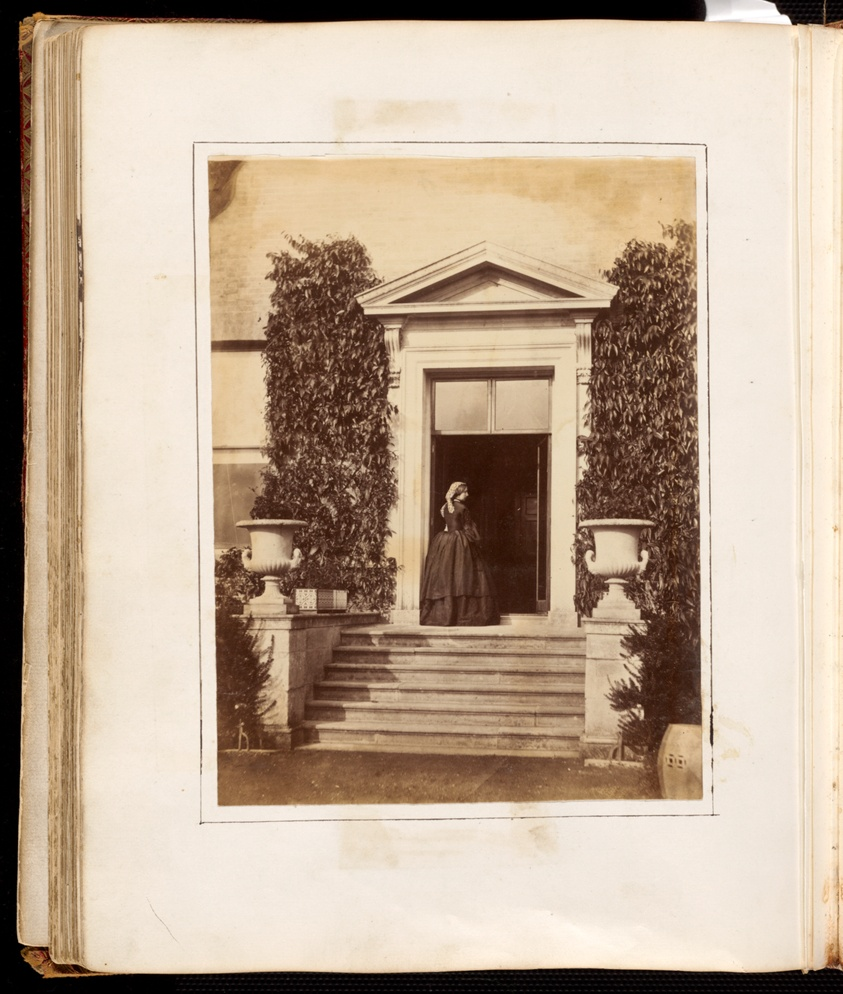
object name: Photograph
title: Untitled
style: 19th century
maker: Artist unknown; English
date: 1849/60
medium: Albumen print, from the "Untitled Album"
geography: England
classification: photograph; albumen silver print; photography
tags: Collected by Hugh Edwards